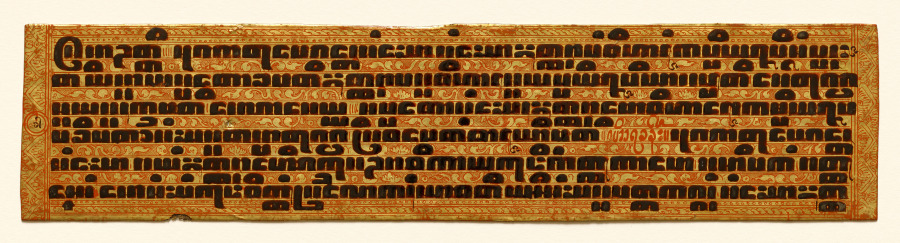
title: Text, folio 14 (verso) from a Kammavacha: Buddhist ordination text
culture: Myanmar (Burma)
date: 1800s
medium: Leaf: lacquer and gilding on cloth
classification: Manuscript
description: In premodern Burma, lay people commissioned lavishly ornamented manuscripts for ceremonial occasions, when officiants would read aloud from the text. Written in black lacquer, the text is in the language of Pali written in a Burmese script. It contains ordination rites and procedures for monastic ceremonies. The second to last page is covered with intricately drawn, winged celestial beings (nats) in gestures of praise. They fly amid intertwining vegetation—denoting bounty—that grows from serpentine forms that refer to rain clouds. Lionlike forms inhabit the space with them. The top and bottom covers are equally ornamented with jeweled floral patterning.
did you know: The Pali text of this manuscript is written in Burmese square script, which is also known as "tamarind seed script."